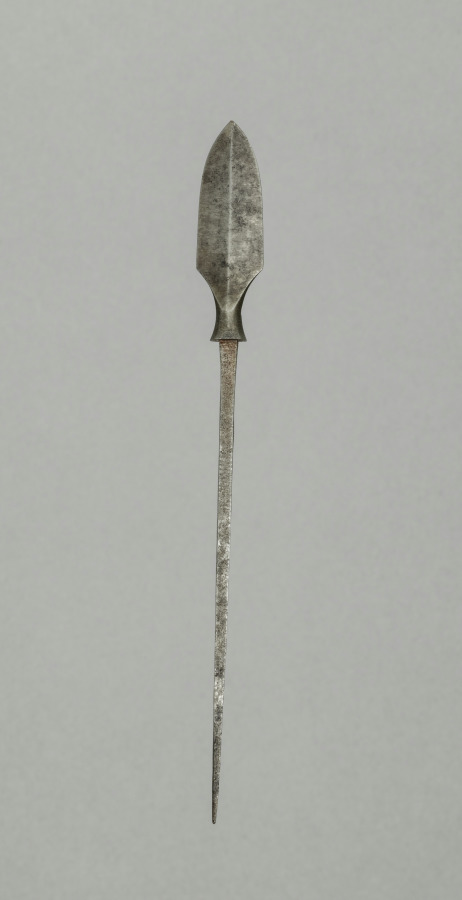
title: Arrow Point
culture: Japan, Edo period (1615–1868)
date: 1700s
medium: steel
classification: Arms and Armor